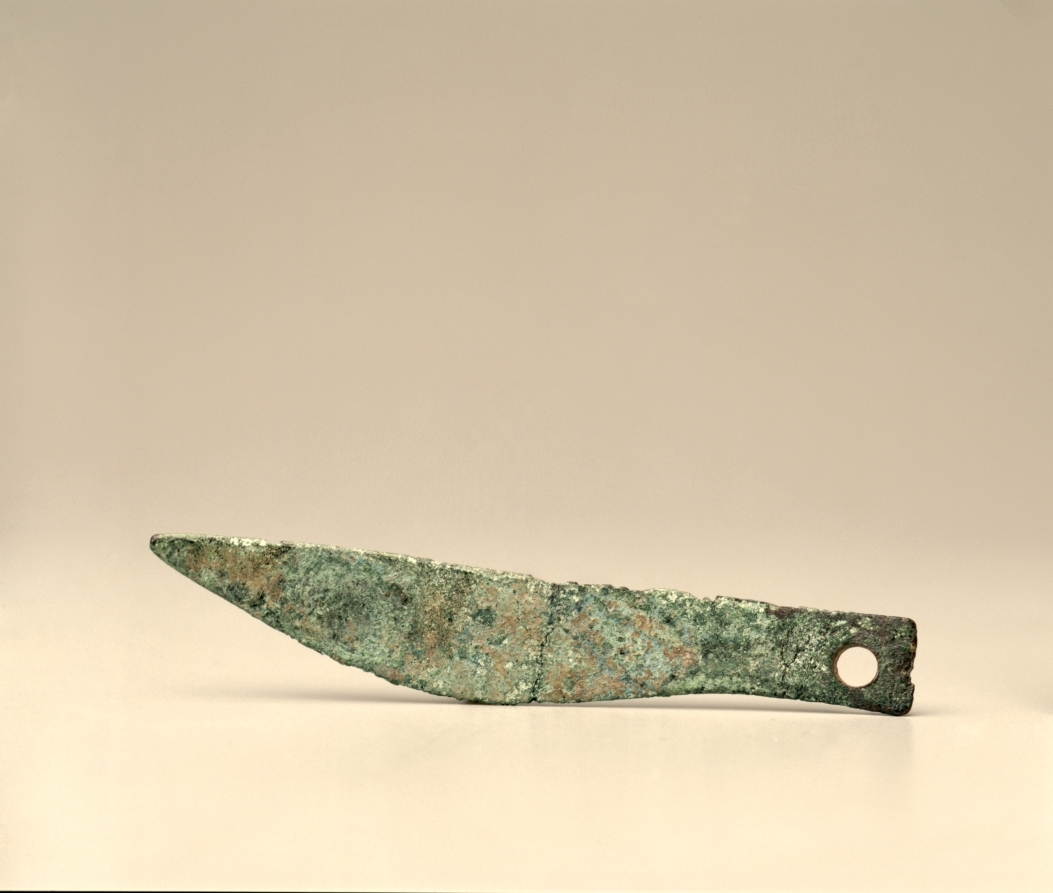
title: Miniature Sword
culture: Etruscan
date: 500–450 BCE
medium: bronze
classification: Sculpture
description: Numerous examples of miniature Etruscan bronze armor and shields are known, often from votive contexts. Perhaps this small sword served such a function.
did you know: This sword was found with the CMA’s Etruscan warrior statuette and—probably wrongly—attached to its left hand.